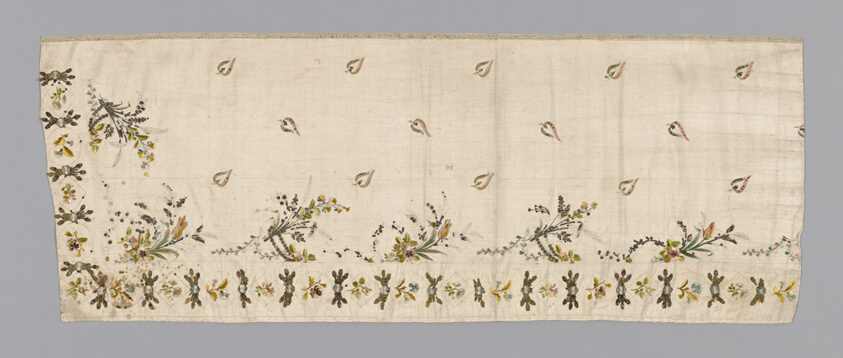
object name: Textile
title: Panel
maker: France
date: 1775/1800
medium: Silk, plain weave; embroidered with silk floss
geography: France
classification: textile; needlework (visual works)